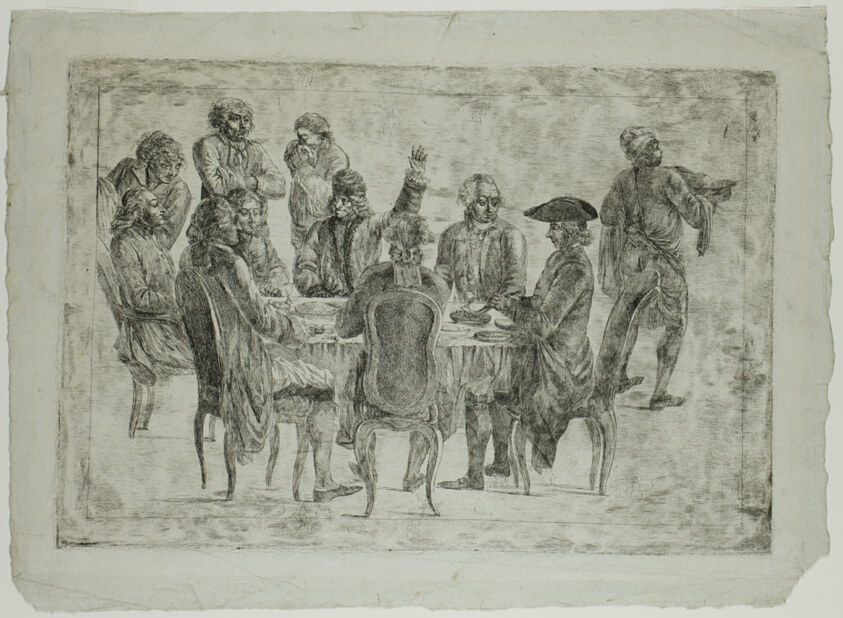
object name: Print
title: Le Déjeuner de Voltaire à Ferney or Le Souper des Philosophes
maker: Unknown Artist; after Jean Huber (Swiss, 1721-1786)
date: c. 1773–75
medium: Etching in black on bluish gray laid paper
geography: Switzerland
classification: etching; paper; print; prints and drawing